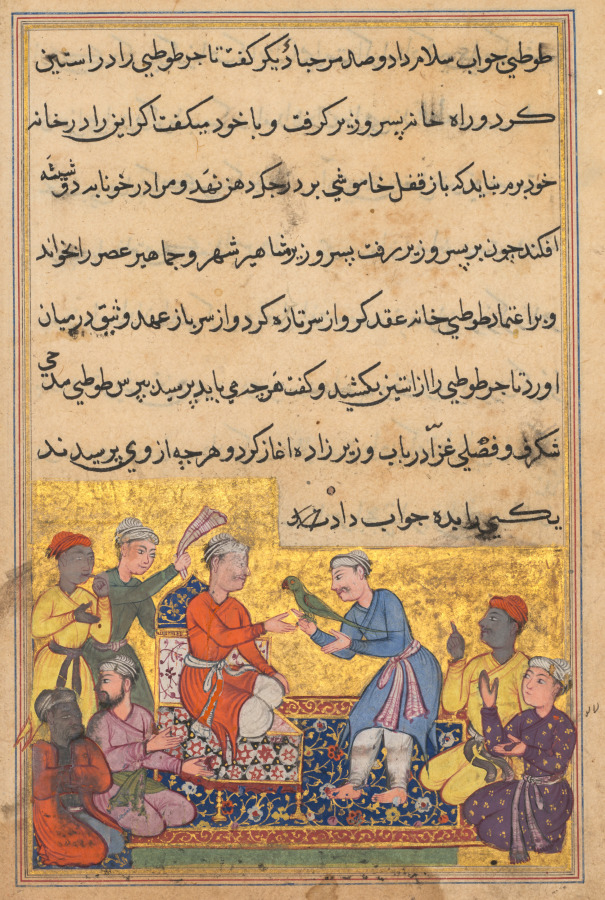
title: The magic parrot of the merchant talks to the vizier’s son, from a Tuti-nama (Tales of a Parrot): Tenth Night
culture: Mughal India, court of Akbar (reigned 1556–1605)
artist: Lalu (Indian, active mid-1500s)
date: c. 1560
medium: gum tempera, ink, and gold on paper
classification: Painting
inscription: lālū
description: The talking parrot, perched on the finger of the merchant, reveals his experience of being repeatedly traded for replicas. These many trades have spoiled the bet between the merchant and the vizier’s son. Members of the vizier’s court react to the story with shock. Together the two men ultimately confront the treacherous monk and their deceptive wives.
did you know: The figure on the left touches his mouth in a gesture of surprise.